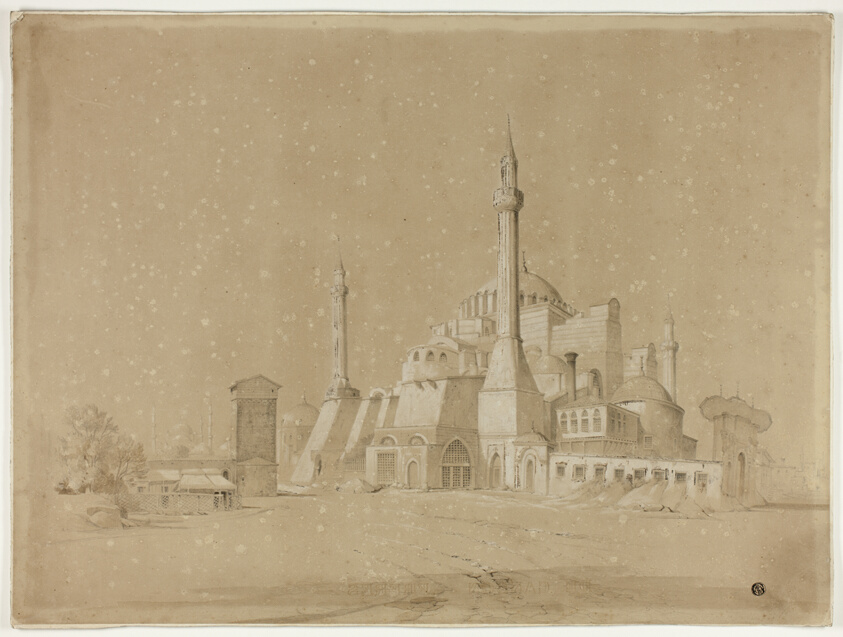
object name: Drawing and Watercolor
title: View of Constantinople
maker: Possibly David Roberts; Scottish, 1796-1864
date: 1840/45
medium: Graphite, heightened with lead white (discolored), with brush and brown wash, on dark tan wove paper, laid down on ivory board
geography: Scotland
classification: graphite; paper; drawings (visual works); prints and drawing